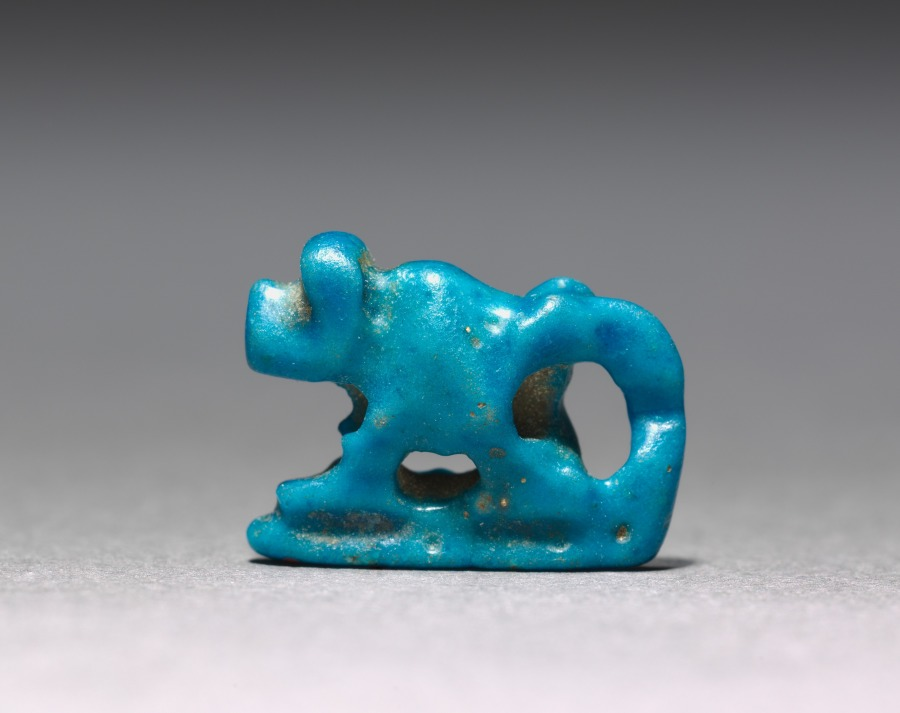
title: Amulets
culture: Egypt, First Intermediate period (2123–2040 BCE)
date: 2123–2040 BCE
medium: turquoise faience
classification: Amulets